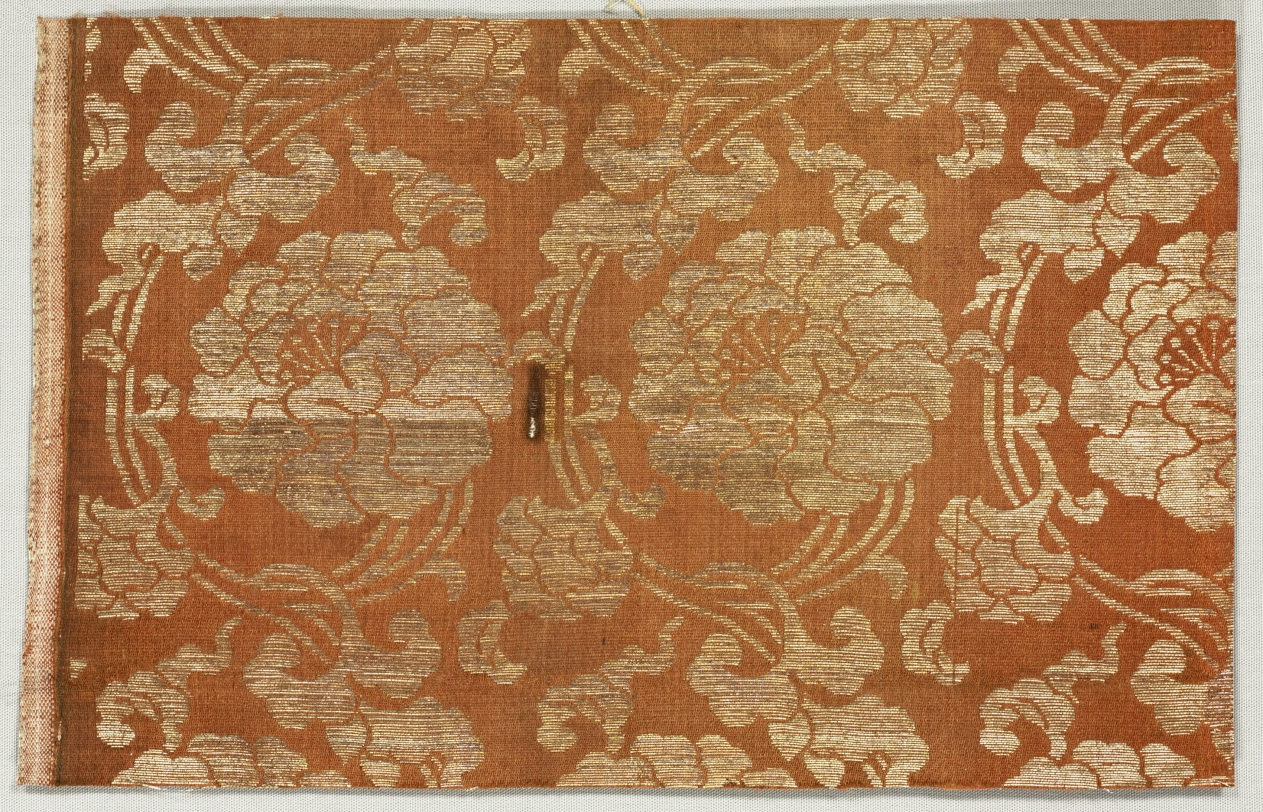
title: Fragment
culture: Japan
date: 1800s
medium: silk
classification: Textile